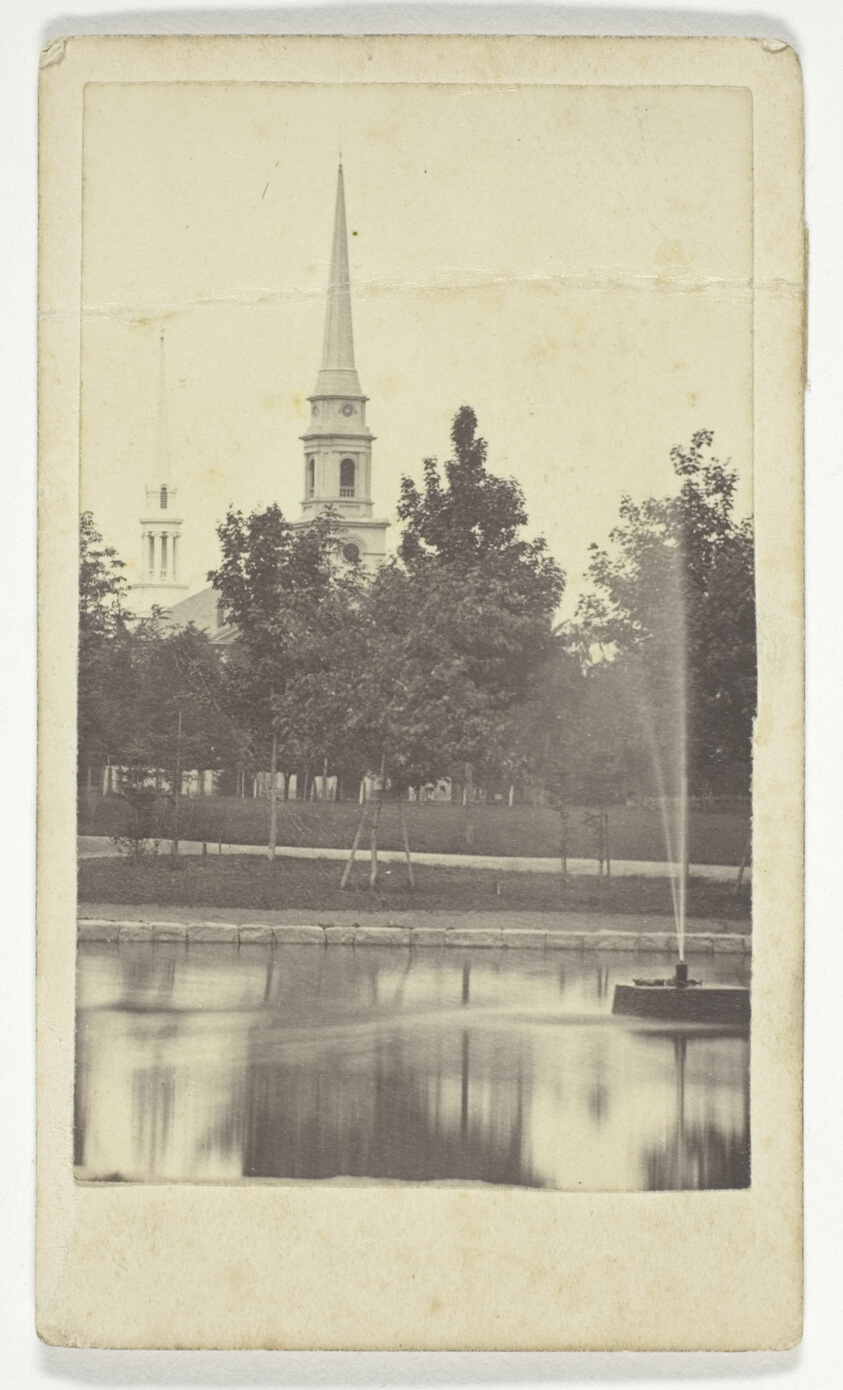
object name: Photograph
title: Untitled (Lawrence, Massachusetts)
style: 19th century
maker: Reed Brothers (American, 19th century)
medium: Albumen print (carte-de-visite)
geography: United States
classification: carte-de-visite (albumen); photographic process; photography; card photographs; photograph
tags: Collected by Hugh Edwards